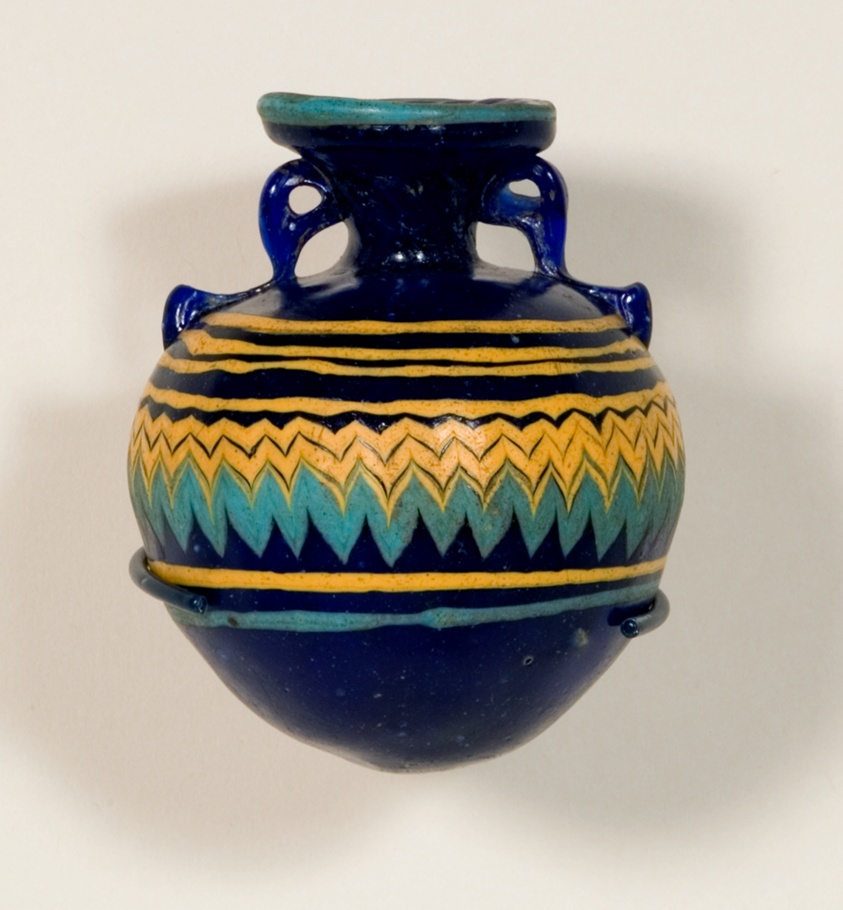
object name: Vessel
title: Aryballos (Container for Oil)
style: ancient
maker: Eastern Mediterranean, possibly Rhodes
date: late 6th-5th century BCE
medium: Glass, core-formed technique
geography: Ródhos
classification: container; aryballos; glass; vessel; ancient art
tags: containers